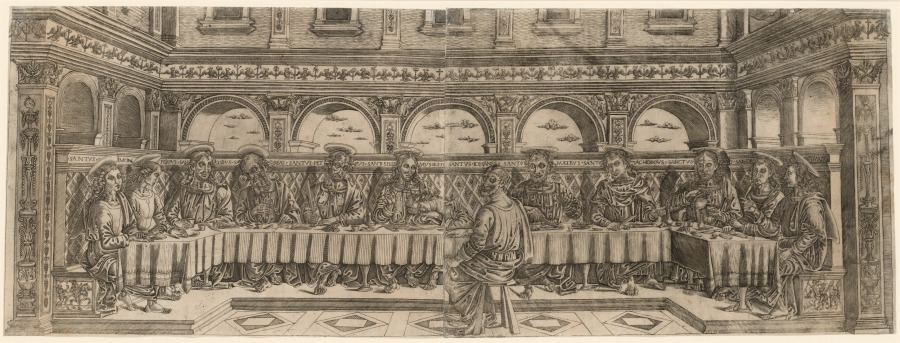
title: The Last Supper (pair)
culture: Italy, 16th century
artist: Lucantonio degli Uberti (Italian)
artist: after Perugino (Italian, c. 1450/55–1523)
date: c. 1500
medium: engraving on two sheets printed from two plates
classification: Print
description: Because large prints were often displayed on a wall, they were susceptible to damage and often have not survived. This large print of the Last Supper, however, is in excellent condition. It was engraved on two plates and printed on two separate sheets of paper. The composition is believed to be a fairly close copy of a fresco by Perugino in the convent of San Onofrio in Florence, around 1495. The scene is set within an arched interior embellished by a frieze of eagles and by half pilasters with floral decorations and putti. Fluffy clouds are visible beyond the archways. Christ and the apostles are on a bench arranged behind the table. Judas, instead, sits on a stool in the middle of the room, looking over his shoulder towards the viewer. The engraver included two reliefs at both ends of the bench. The panel on the right shows Judas with four soldiers, while the one on the left features a knight, a squire, and a banner. On it, the letters LVC . . . TNO have been interpreted as the artist's signature.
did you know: This print is the only known impression of the entire composition. A copy with only the right side is preserved today at the British Museum in London.